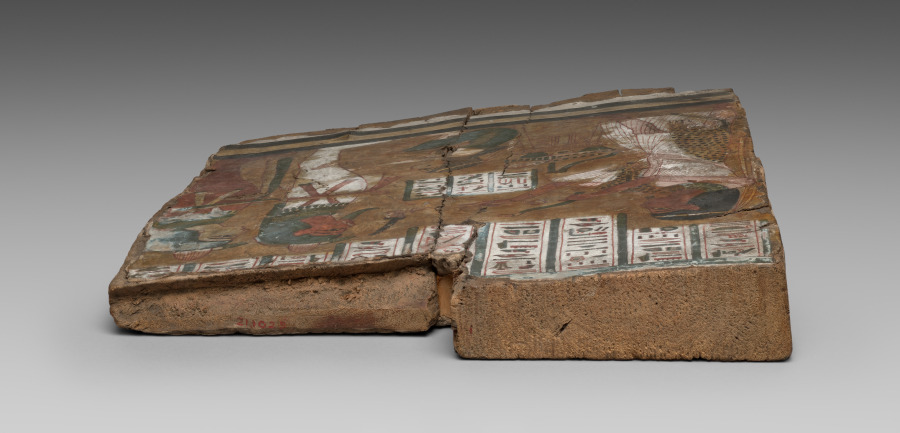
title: Side Panel from the Coffin of Amenemope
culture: Egypt, Thebes, Third Intermediate (1069–715 BCE), Dynasties 21–22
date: c. 976–889 BCE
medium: gessoed and painted sycamore fig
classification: Funerary Equipment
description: This panel illustrates one of the same scenes shown on the inside of Nesykhonsu’s coffin, allowing us to compare different artist’s styles. On the right stand the mummies of the priest Amenemope and his wife, Taditkhonsu. Their daughter, called "the lady of the house, Mutemperes," crouches before them with her hands wrapped around Amenenope’s legs in a traditional gesture of mourning. On the left, a priest, dressed in his finest linen garments and panther skin, holds in his upraised hands an incense burner and a curious curved implement typically associated with the "opening of the mouth" ritual, in which the mummy’s mouth was magically opened so that the deceased person could take in food and thus be brought back to life.